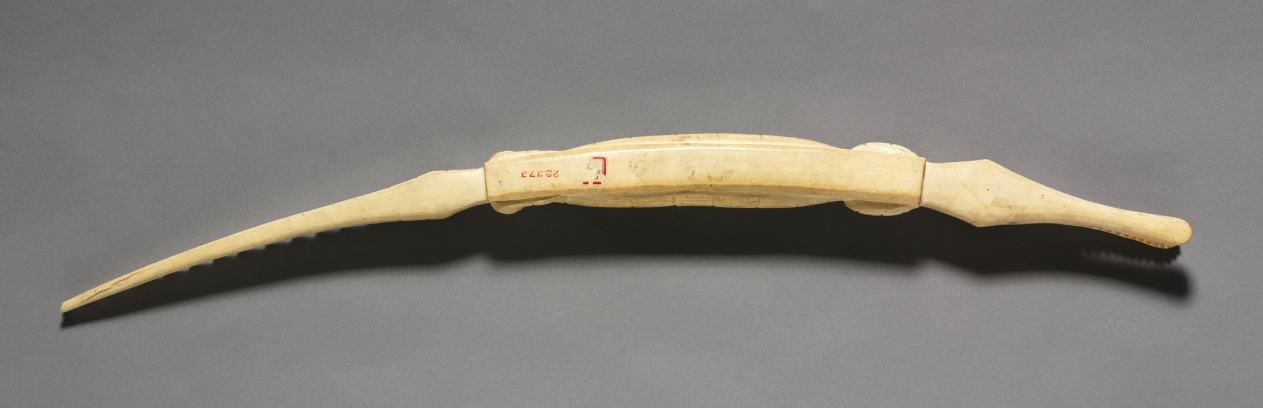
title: Alligator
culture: Africa, Central Africa, Democratic Republic of Congo, unknown maker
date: 1900s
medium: Elephant ivory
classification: Sculpture